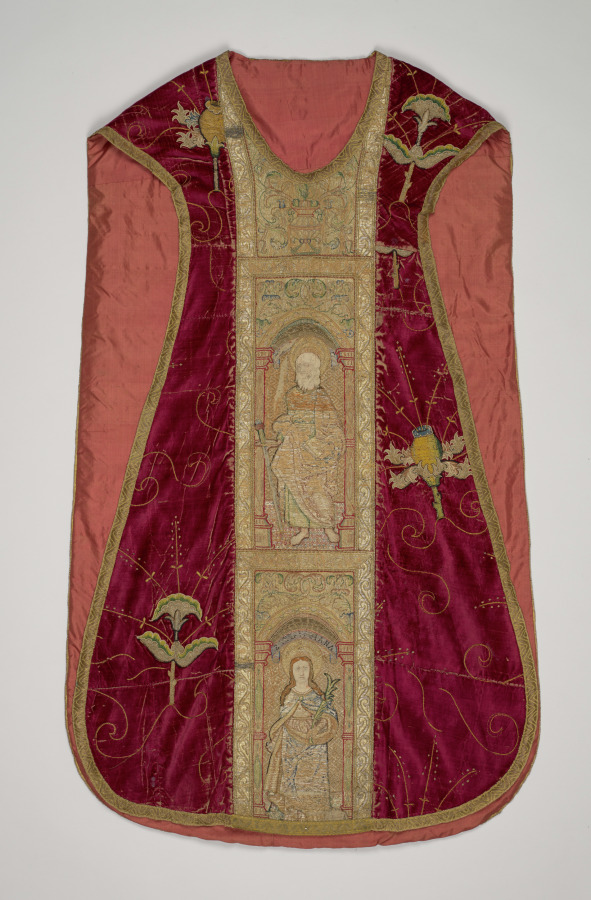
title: Chasuble with Orphrey Band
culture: England, London (embroidery) and Italy, Florence (velvet), early 16th century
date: 1500–1520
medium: Silk, gold thread, sequins; appliqué, embroidery: couching stitches Velvet: solid pile, silk; embroidery: or nué (shaded gold)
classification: Embroidery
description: The English adopted a simpler style of embroidering vestments suitable for mass production around 1500. Isolated motifs, often floral, were embroidered on plain velvet, as in this ecclesiastical chasuble. The orphrey, or embroidered band, in the center depicts Saints Peter, John the Evangelist, and Andrew, identified by their names and attributes (top to bottom). Most of the surface is covered with gold thread sewn down by silk thread passing over it in different densities to create the effect of modeling. Silk thread was also used to embroider areas of skin and hair (mostly disintegrated).